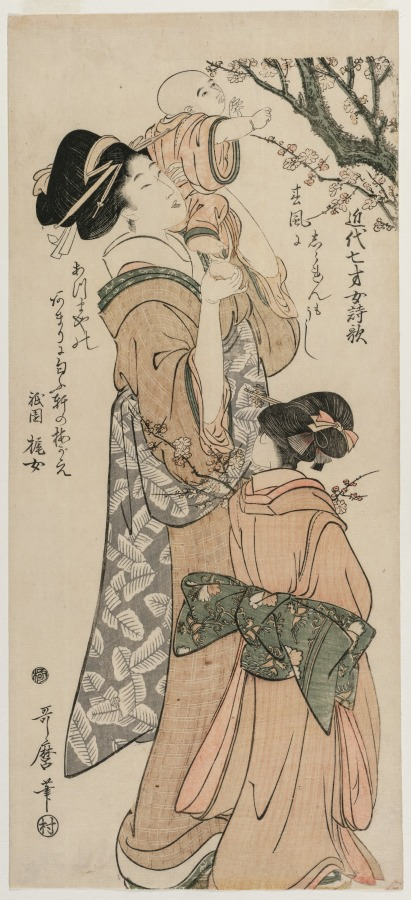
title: Mother Lifting a Child to a Plum Tree (from the series Chinese and Japanese Poems by Seven Year Old Girls of Recent Times)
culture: Japan, Edo period (1615–1868)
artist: Kitagawa Utamaro (Japanese, c. 1754–1806)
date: late 1790s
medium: color woodblock print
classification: Print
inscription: Signature: Utamaro hitsu Publisher: Murataya Jirobei (Mura)